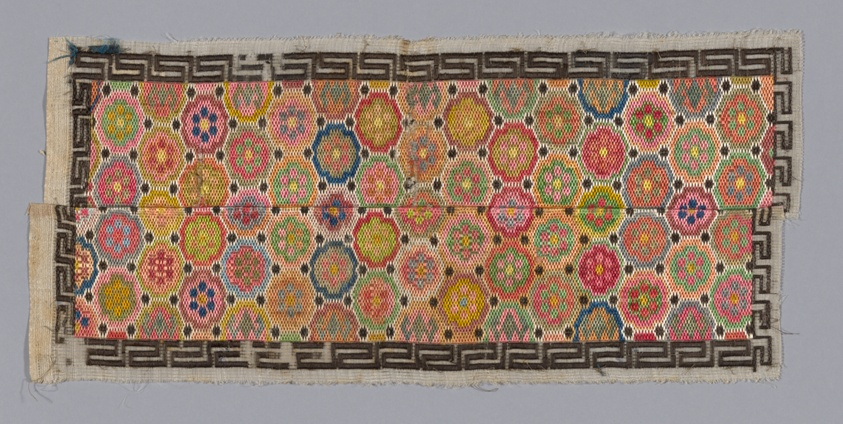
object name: Textile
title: Panel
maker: Han-Chinese (China)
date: Qing dynasty (1644–1911), 1875/1900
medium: Forty-four pairs and eight odd pieces of embroidered sleeve, ankle bands, etc. on gauze.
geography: China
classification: embroidery; textile